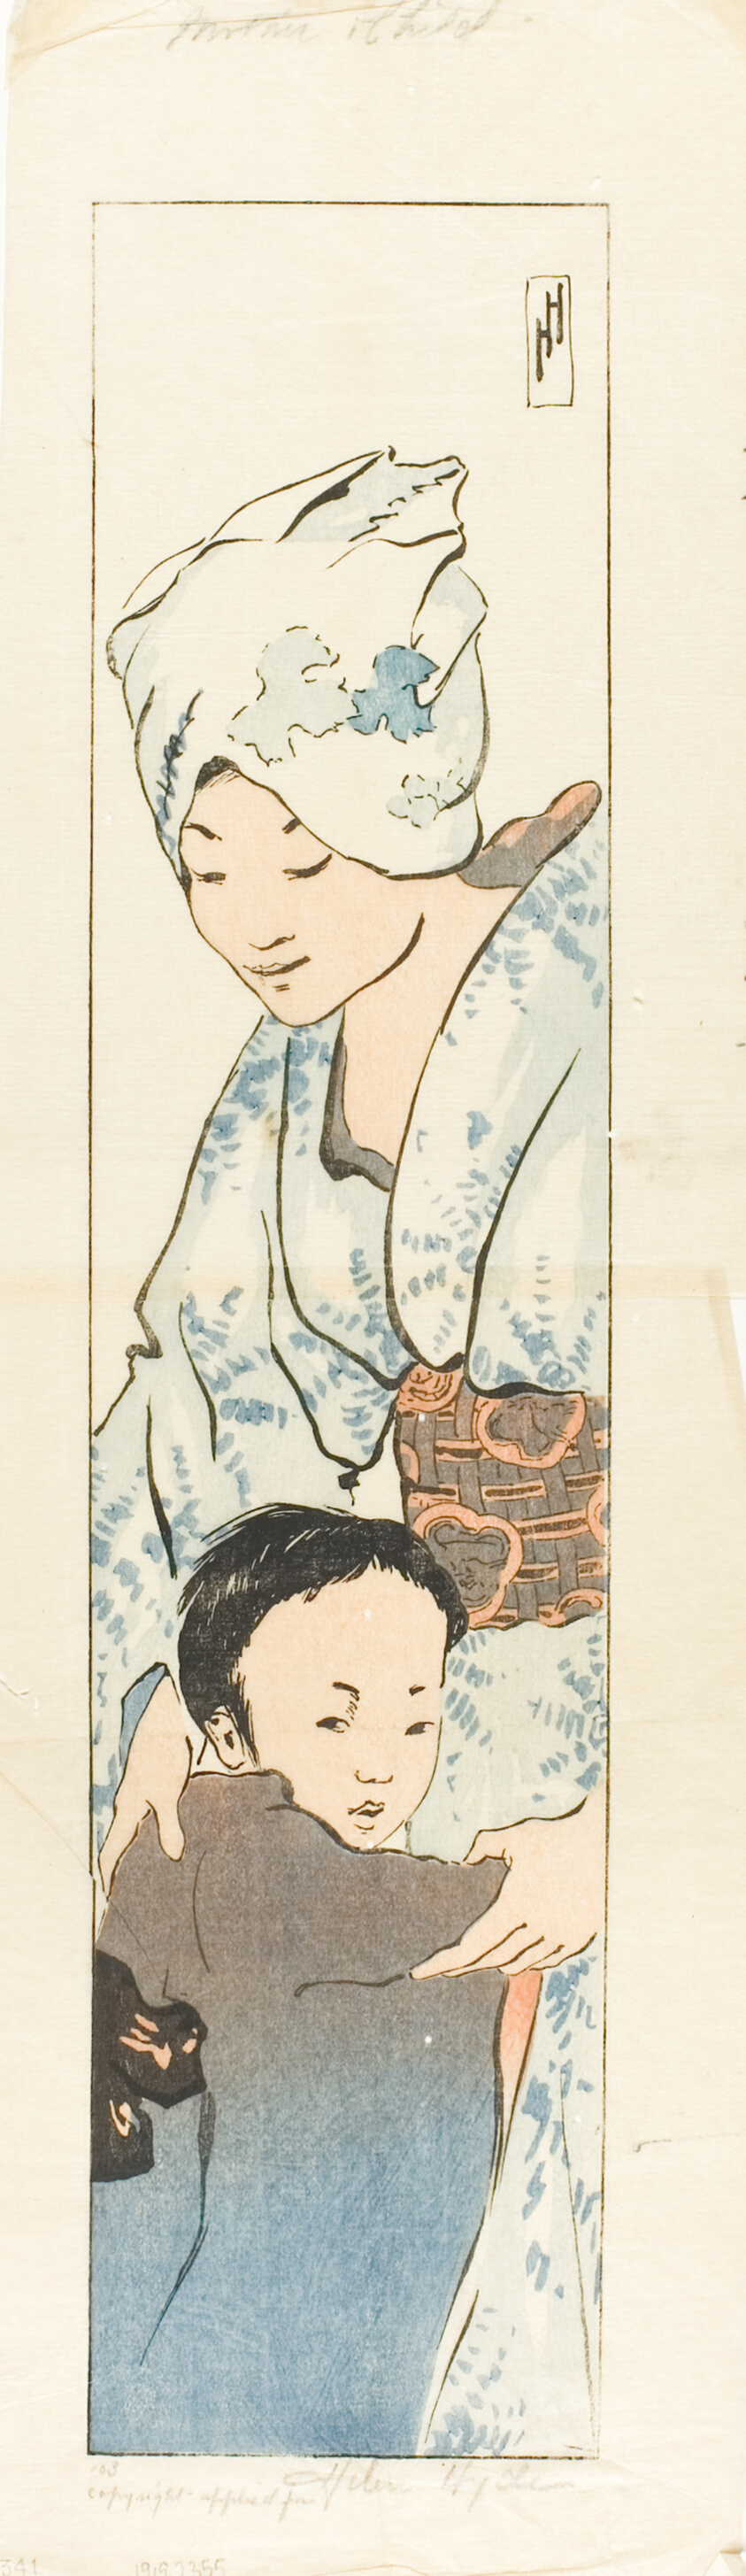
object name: Print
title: Mother and Child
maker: Helen Hyde (American, 1868-1919)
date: 1901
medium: Color woodcut on paper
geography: United States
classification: woodcut; print; prints and drawing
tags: mothers, children